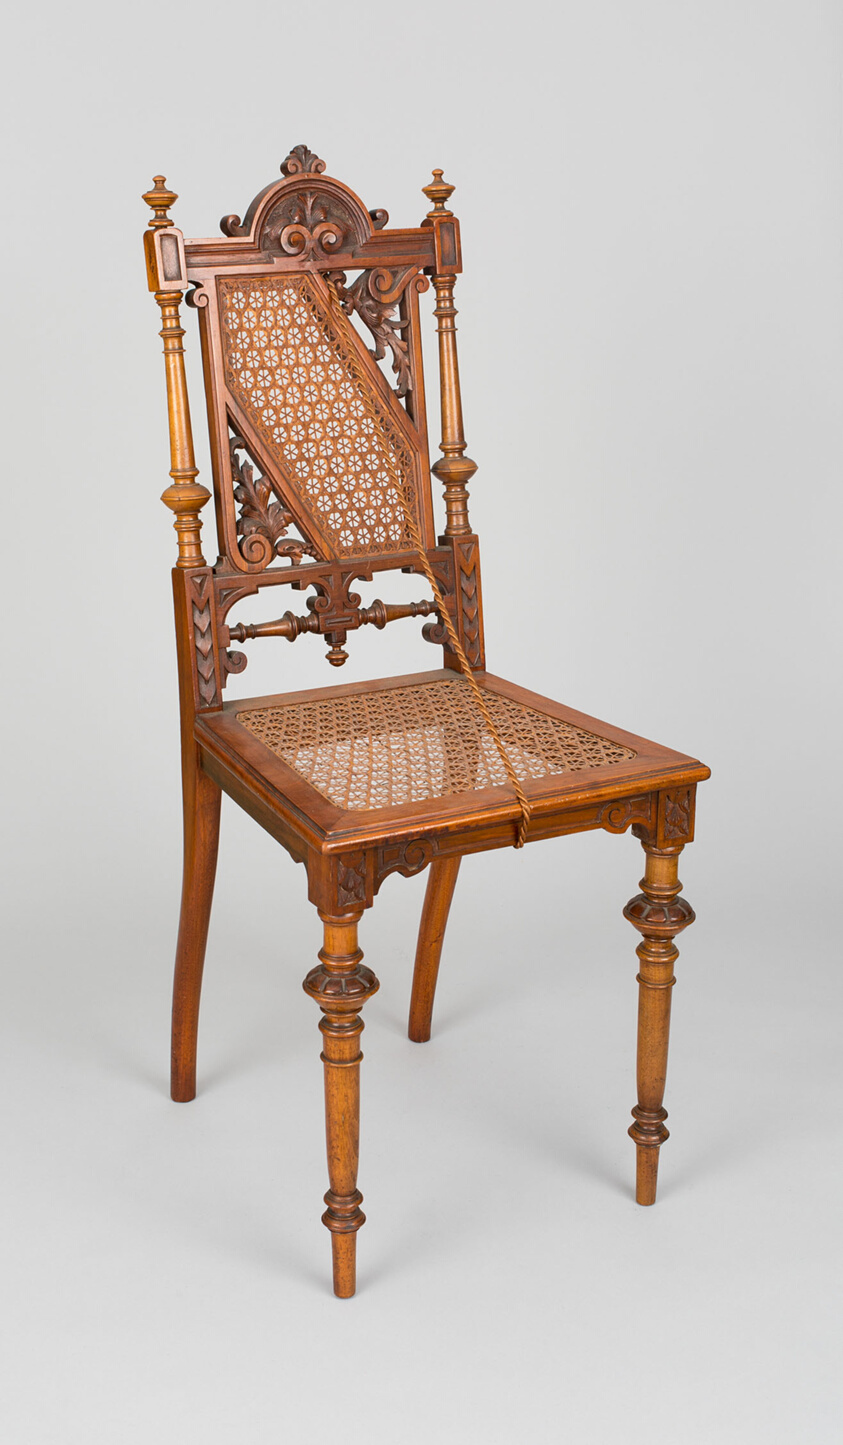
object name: Furniture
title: Side Chair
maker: Jacob Keller; German, active early 20th century; Gunzenhausen, Germany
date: 1900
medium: Walnut, caning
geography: Germany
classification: chair; seating; furniture; european decorative arts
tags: furniture